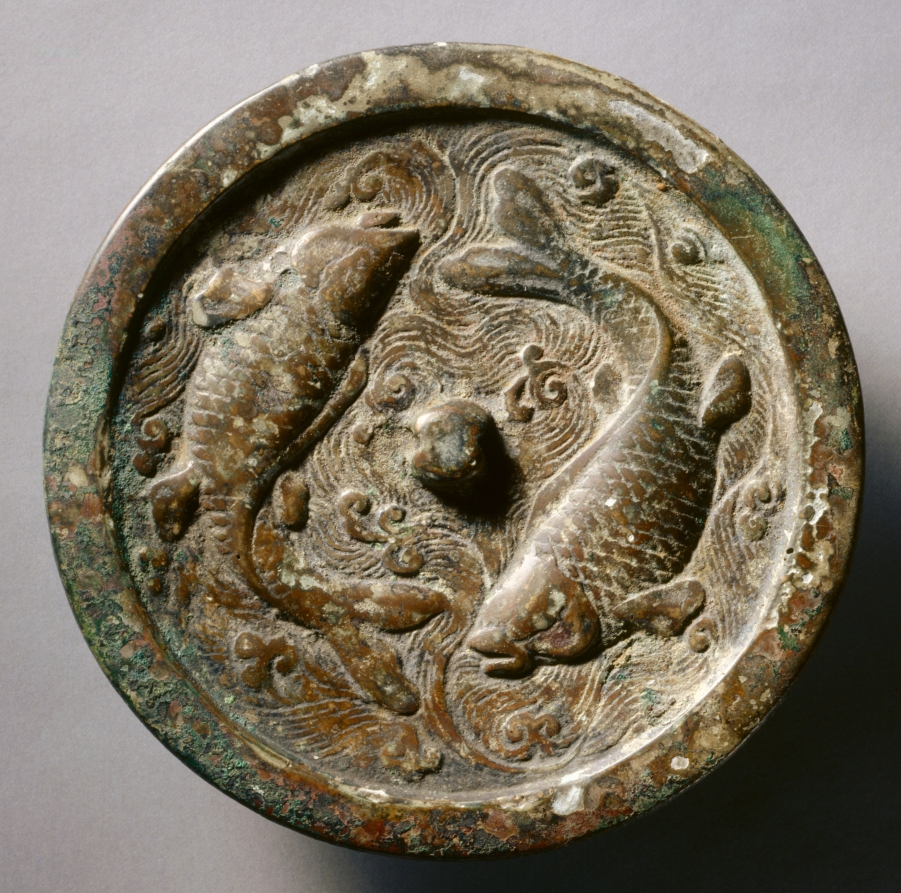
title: Mirror with Twin Carp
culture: China, Jin dynasty (1115-1234)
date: c. 1200–25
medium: bronze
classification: Metalwork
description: Mirror with Twin Carp, about 1200-25 China, Jin dynasty (1115-1234) CMA 1995.379 [Cat. no. 86]